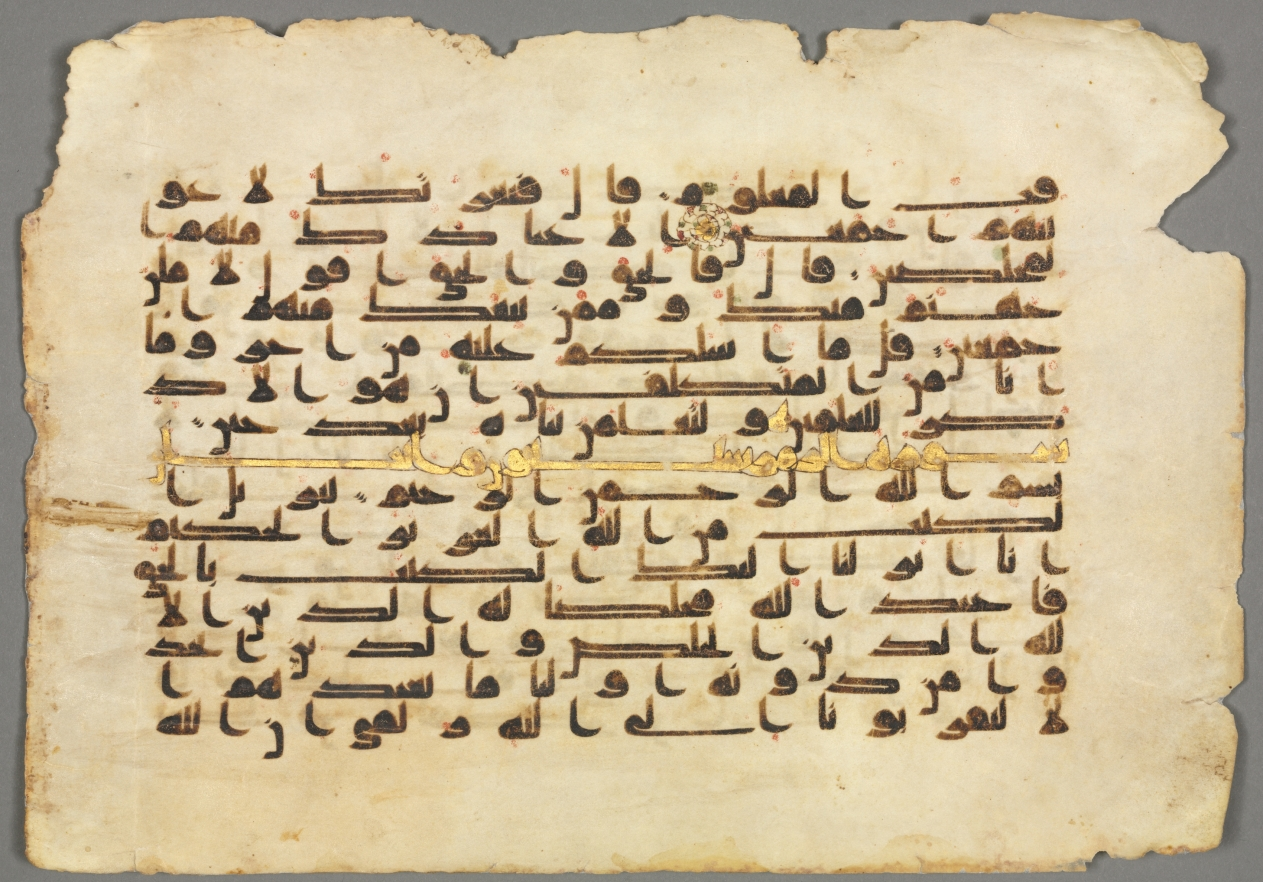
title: Qur'an Manuscript Folio (recto)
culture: Iraq or Iran, Abbasid period, 9th–10th century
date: 800s–900s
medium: ink, gold, and color on parchment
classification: Calligraphy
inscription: Kufic script. Text: XXXVIII:81–88, XXXIX:1–3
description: This page features the last eight verses of the Sura al-Sad (named for the Arabic letter sad) and the opening verses of the Sura al-Zumar (the Companies). The latter begins: The sending down of the Book is from God the All-mighty, the All-wise. We have sent down to thee the Book with the truth; so worship God, making thy religion His sincerely.